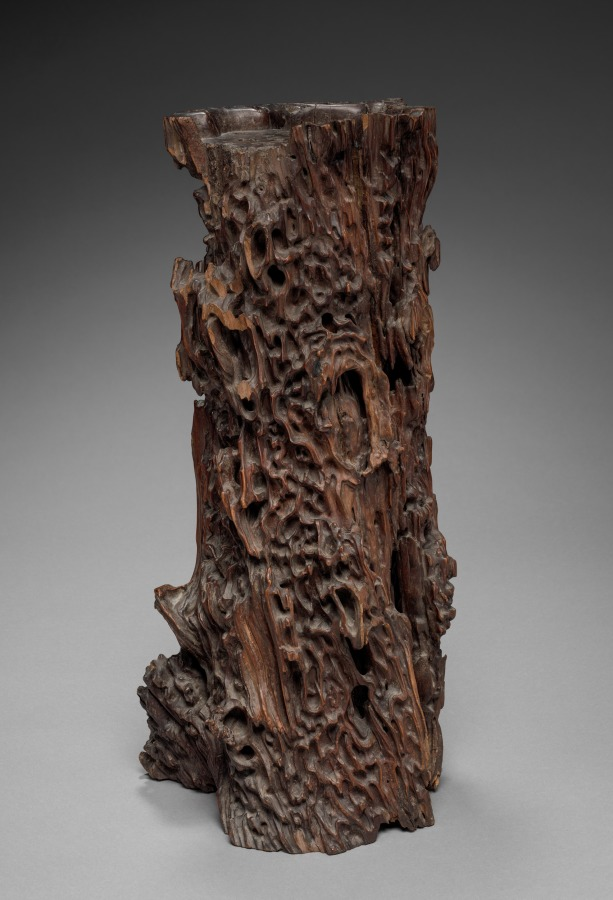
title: Prunus Wood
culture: China, Qing dynasty (1644-1911)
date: 1700–1899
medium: wood carving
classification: Wood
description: The gnarled and twisted form of a prunus stump is carved to accentuate its naturally textured surface. The body is finely polished to create a lustrous patina. Simple wood carvings like this exemplify the Chinese scholars’ taste for natural forms and rustic materials, which in turn reflect the desire to retreat into nature. They were collected and displayed as decorative works of art in the traditional scholars’ studios.